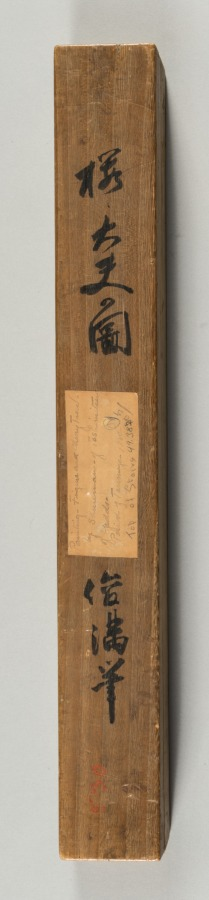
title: Woman and Two Children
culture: Japan, Meiji period (1868–1912)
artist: copy after Kubo Shunman (Japanese, 1757–1820)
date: early 1900s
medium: hanging scroll; color and gold on silk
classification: Painting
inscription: signed Kubo Shunman